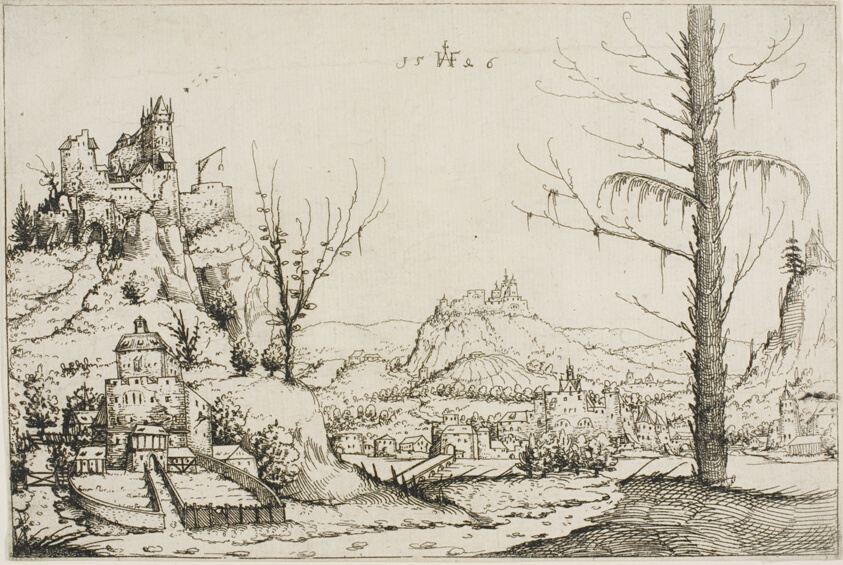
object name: Print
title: Landscape with a Fortress on a Hill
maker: Augustin Hirschvogel (German, 1503-1553)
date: 1546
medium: Etching on paper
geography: Germany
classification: etching; print; prints and drawing